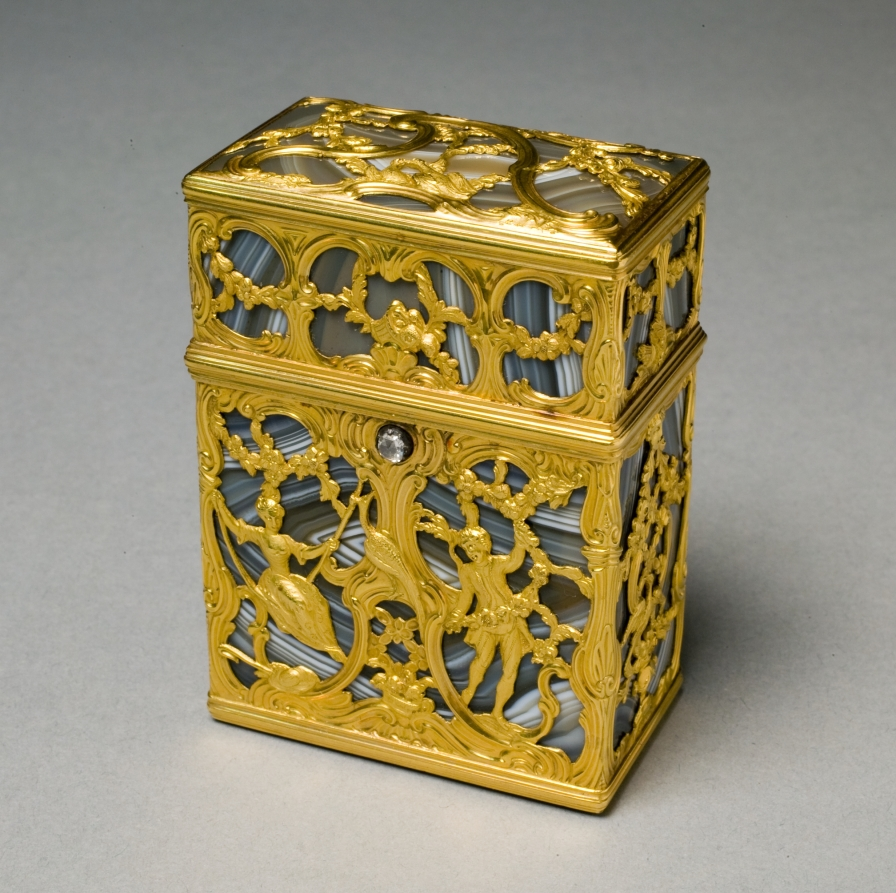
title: Vanity Set (Nécessaire)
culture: England, London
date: c. 1750–60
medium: gold, agate, interior fitted with gold-mounted implements, mirror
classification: Miscellaneous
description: Luxurious personal objects were an essential part of a privileged wardrobe during the 1700s and early 1800s, emphasizing their owner’s refinement and wealth. Jewelry, miniatures, and nécessaires—small expensive sets designed to hold grooming, writing, and sewing tools—were often given as intimate gifts, intended to be seen and admired. Their glittering surfaces, however, disguised a system based on the labor and suffering of enslaved or indentured people, whether in gold and stone mines or shops where these goods were made.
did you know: This small box with a mirror-lined lid is a dressing table accessory that contains luxury objects such as a clasp knife, snuff spoon, tweezers, and scent bottles.